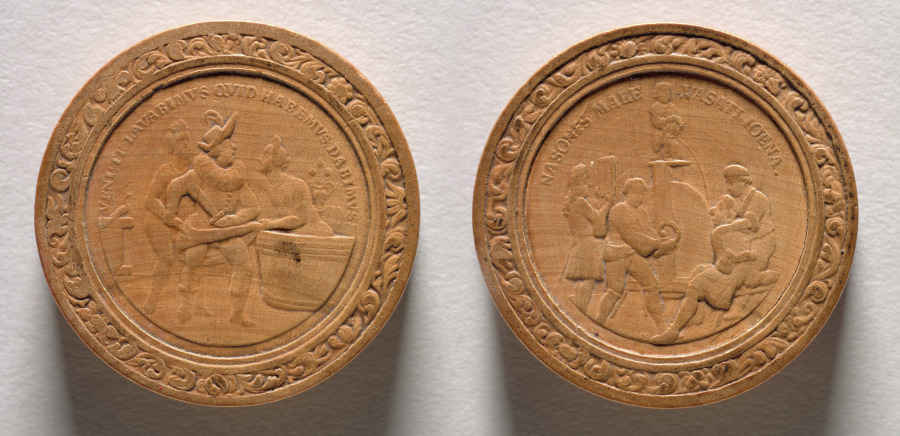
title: Gaming Piece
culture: Germany, late 17th-early 18th Century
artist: Martin Brunner (German, 1659–1725)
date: c.1700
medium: wood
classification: Furniture and woodwork